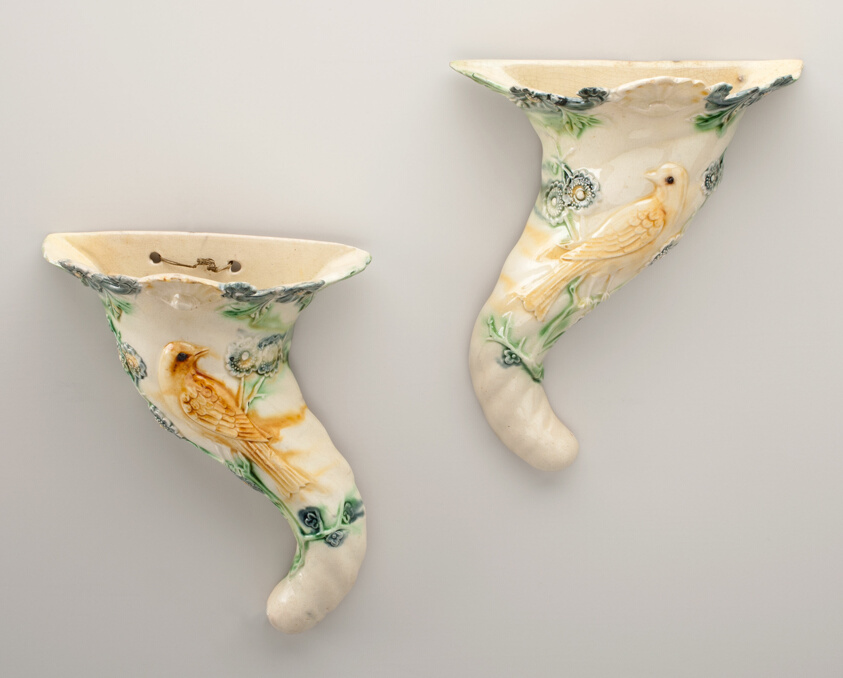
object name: Ceramics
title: Pair of Wall Pockets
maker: Staffordshire, England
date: 1770/80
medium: Lead-glazed earthenware (creamware)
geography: Staffordshire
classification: earthenware; ceramics; creamware; european decorative arts; lead-glazed earthenware